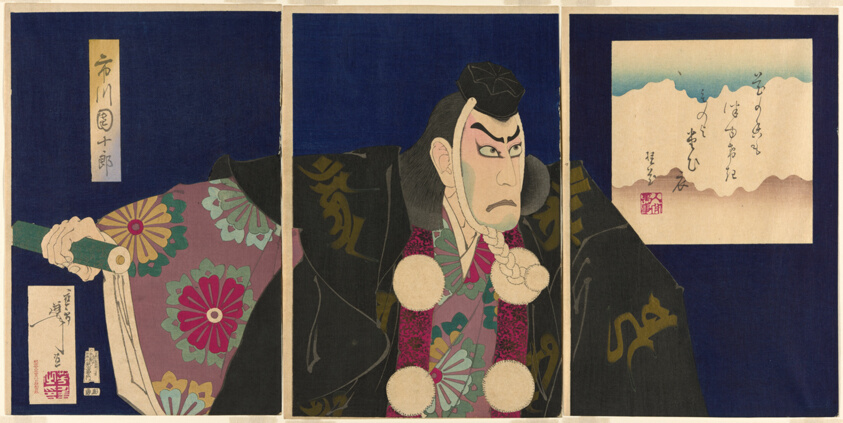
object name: Print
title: The actor Ichikawa Danjuro IX as Musashibo Benkei in the play "The Subscription List (Kanjincho)"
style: Japanese (culture or style)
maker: Tsukioka Yoshitoshi (Japanese, 1839–1892)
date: 1890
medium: Color woodblock prints; oban triptych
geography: Japan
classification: woodblock print; print; asian art